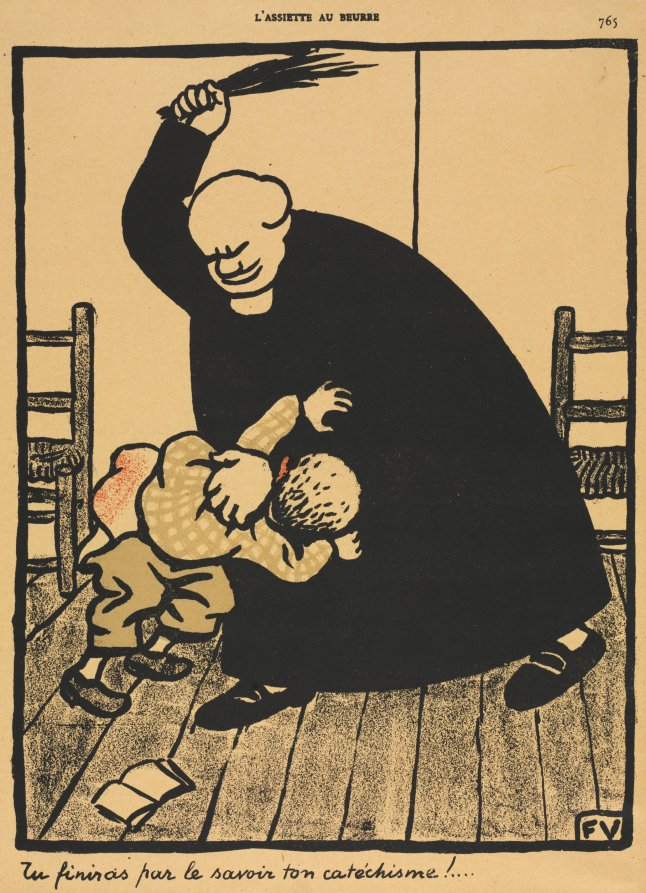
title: You'll learn...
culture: France, 19th century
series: Crimes and Punishments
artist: Félix Vallotton (Swiss French, 1865–1925)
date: 1901, published 1902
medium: color lithograph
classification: Print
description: This print was published in the magazine L’Assiette au Beurre (March 1, 1902 ) as plate 8 from the series Crimes and Punishments.